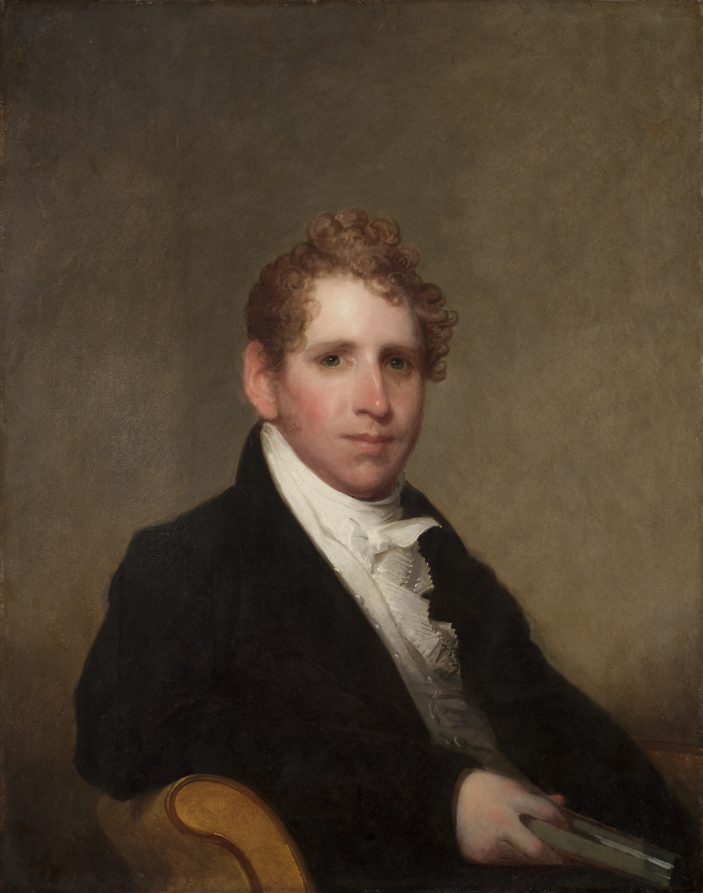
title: Dr. James Stuart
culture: America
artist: Gilbert Stuart (American, 1755–1828)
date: c. 1815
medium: oil on wood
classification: Painting